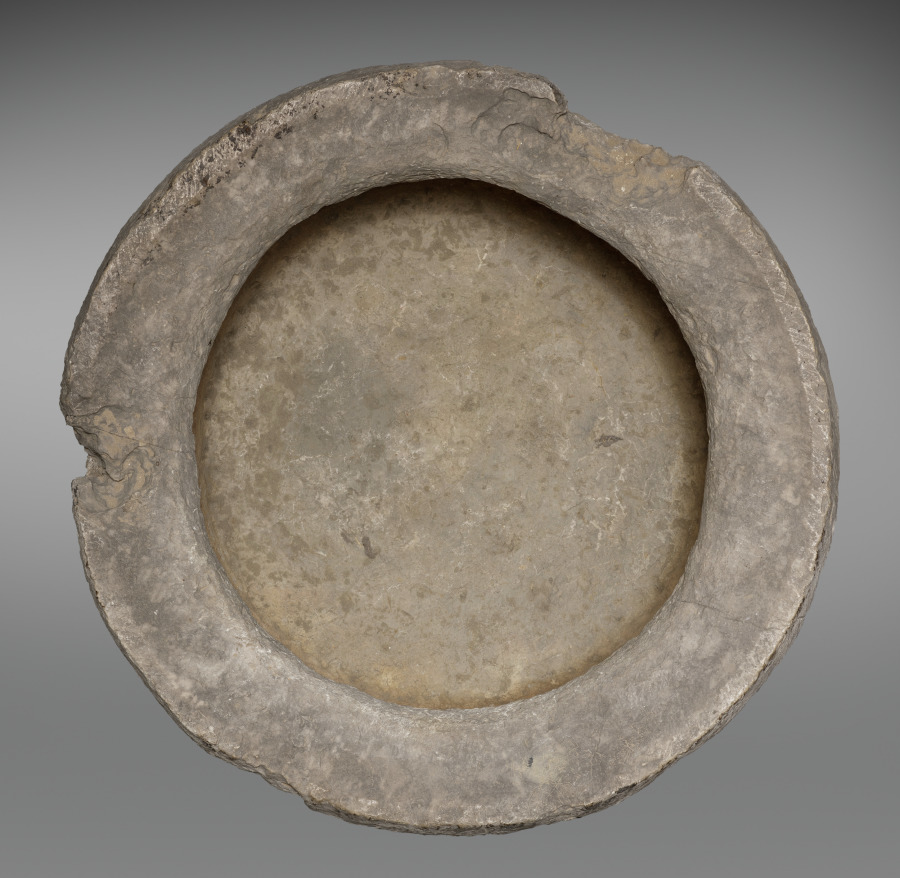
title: Garden Pot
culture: Italy, 19th century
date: 19th Century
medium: stone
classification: Miscellaneous